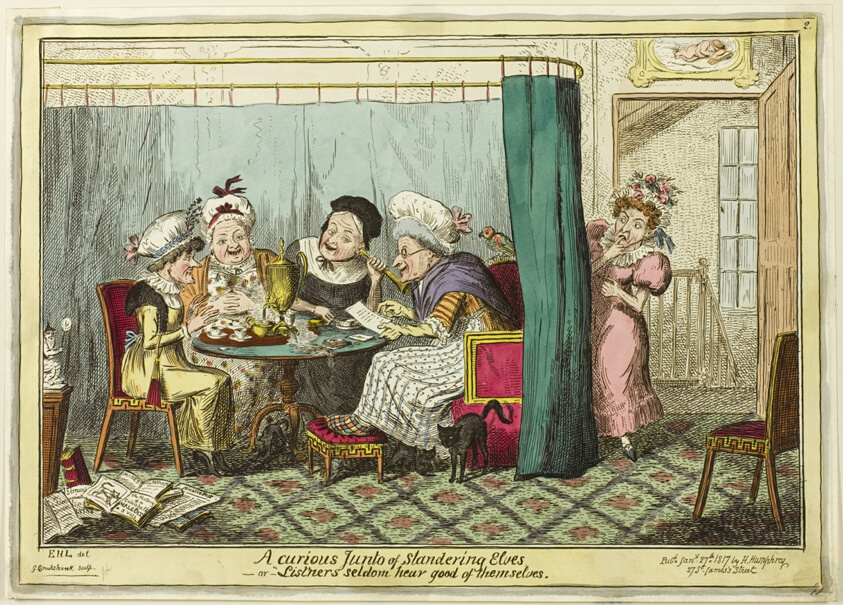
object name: Print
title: A Curious Junto of Slandering Elves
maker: George Cruikshank (English, 1792-1878); published by Hannah Humphrey (English, c. 1745-1818)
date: January 27, 1817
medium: Hand-colored etching on paper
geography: England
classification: etching; print; prints and drawing